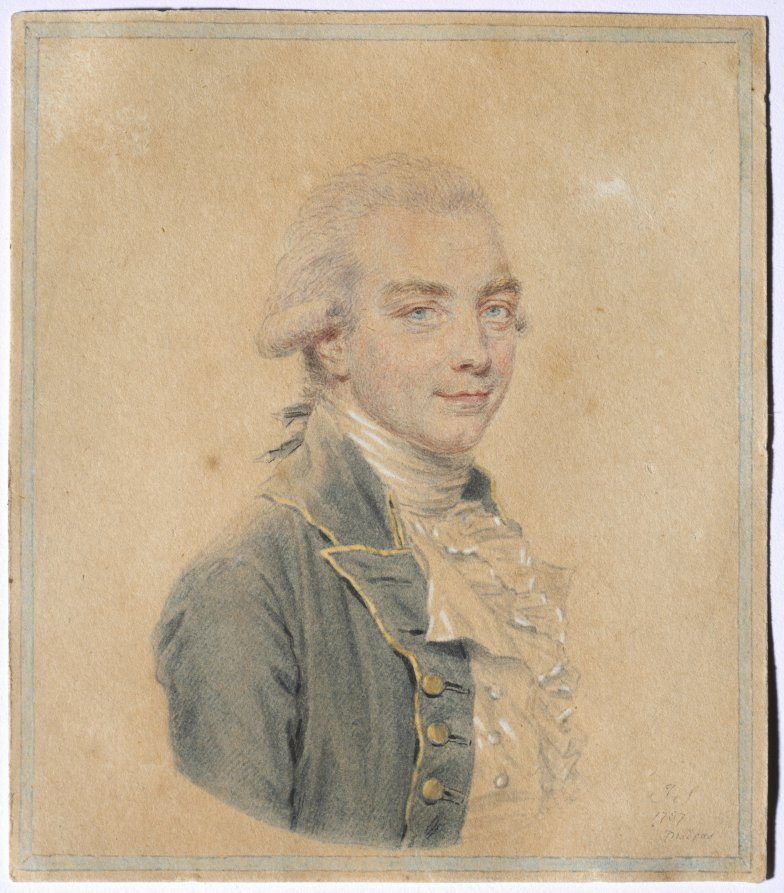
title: Portrait of Sir John Macpherson, 1st Baronet, Governor-General of India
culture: England, 18th century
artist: John I Smart (British, 1741–1811)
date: 1787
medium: watercolor and gouache heightened with white gouache on paper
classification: Portrait Miniature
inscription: signed, lower right, in black ink: J S / 1787 / Madras ; VERSO, lower right, in graphite: 6 1/8 x 6 7/8 Foskett, Daphne. John Smart: The Man and His Miniatures, pp. 13, 76, 89. London: Cory, Adams & Mackay, 1964.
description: The sitter’s head and shoulders face left. He smiles slightly and has light blue eyes, with his powdered hair curled above the ear and tied en queue. He wears a green jacket edged in gold with gold buttons and dons a high white collar, a waistcoat, and a frilled cravat, each highlighted with white gouache. The nature of this work as a finished drawing rather than exclusively a preparatory sketch for a miniature on ivory is evident in the degree of finish of the sitter’s clothing, which is painted to the oval termination within a border of pale blue gouache. A Colnaghi label was removed from the verso after the work entered the museum’s collection. Sir John Macpherson (1745–1821) was the son of a Scottish minister. His many tours of service with the East India Company were marred by corruption and scandal. He was made acting governor-general of India in 1785–86 between the resignation of Warren Hastings (1732–1818) and the succession by Lord Cornwallis (1738–1805). Macpherson was created a baronet in 1786 when he was removed from office, returning to England shortly thereafter. He was an inveterate bachelor, popular in society for his handsomeness, charm, and facility with languages, but also known for his avarice and fraudulence. The work is signed with Smart’s initials and dated “1787 Madras” at the lower right. Macpherson was no longer governor-general in 1787 and would have been preparing to return to England when this portrait was painted. The drawing is inscribed on the back in the artist’s hand: “a sketch of Sir John Macpherson painted at Madras, 1787, on his passage from Bengall [sic] to England by Jno [sic] Smart.” Smart did not return to England until 1795, so the word passage must be defined as “on his journey” rather than “aboard ship.” At the time this portrait was taken, Macpherson was grappling with his premature removal from office and beginning to plot what would become many years of negotiations to regain his position or receive compensation for having lost it, though none of this emotional turmoil is visible in Smart’s portrait.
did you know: John Smart retained hundreds of sketches which were passed down in turn to his son, granddaughter, and great-grandchildren.